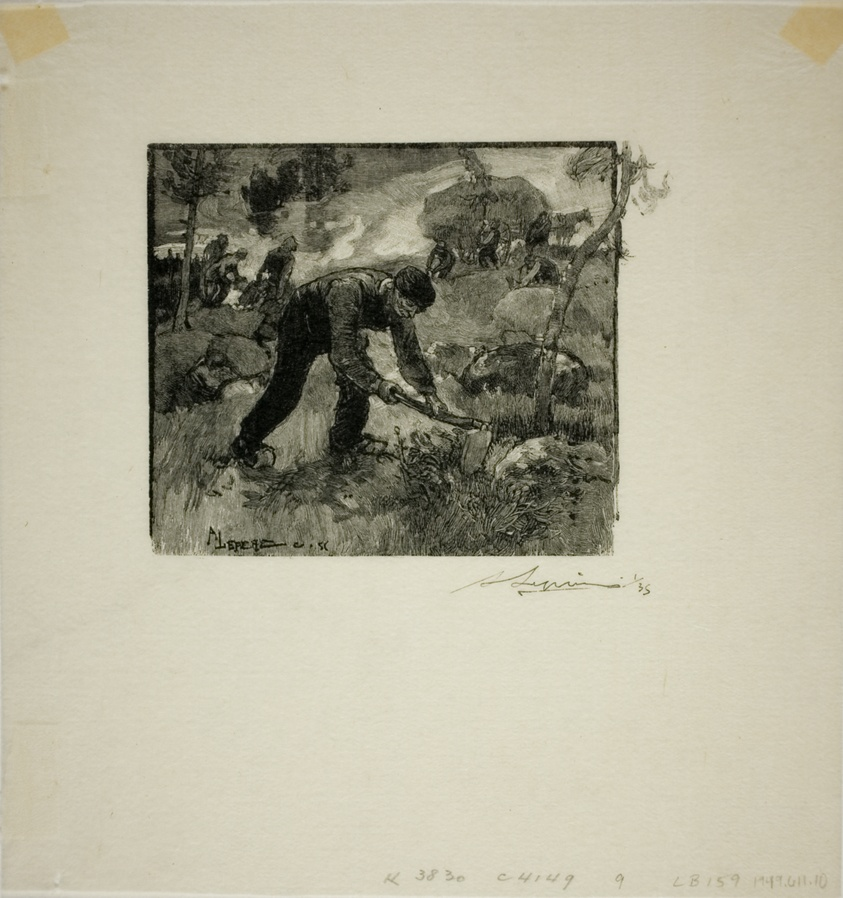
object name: Print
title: Root Extractors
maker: Louis Auguste Lepère (French, 1849-1918); published by A. Desmoulins (French, active c. 1908-1910)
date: 1887, published 1908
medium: Wood engraving in black on cream laid Japanese paper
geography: France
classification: wood engraving; print; prints and drawing